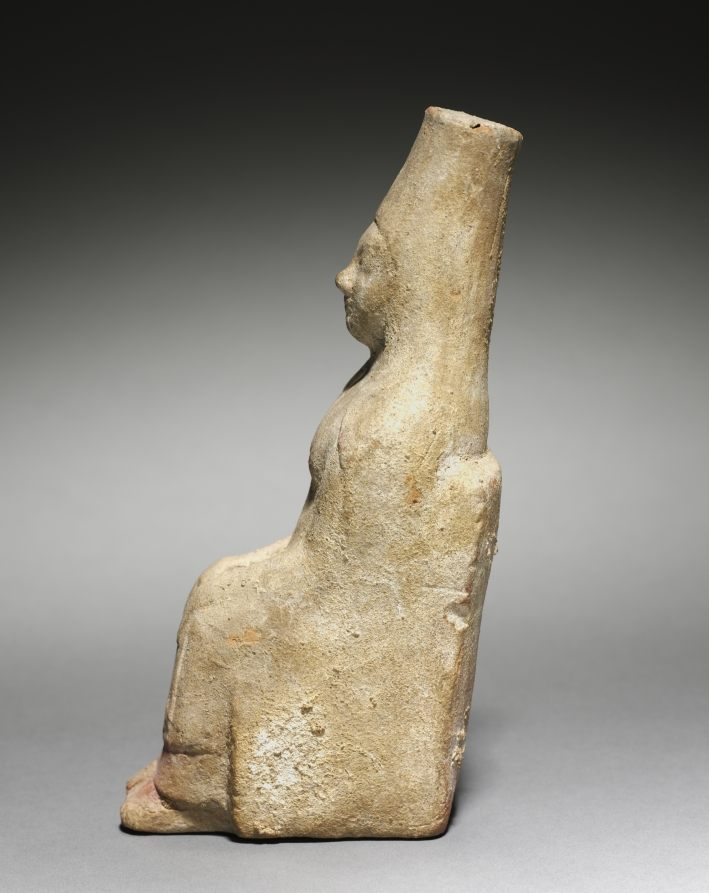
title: Seated Goddess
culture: Greece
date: 500s BCE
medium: terracotta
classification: Sculpture